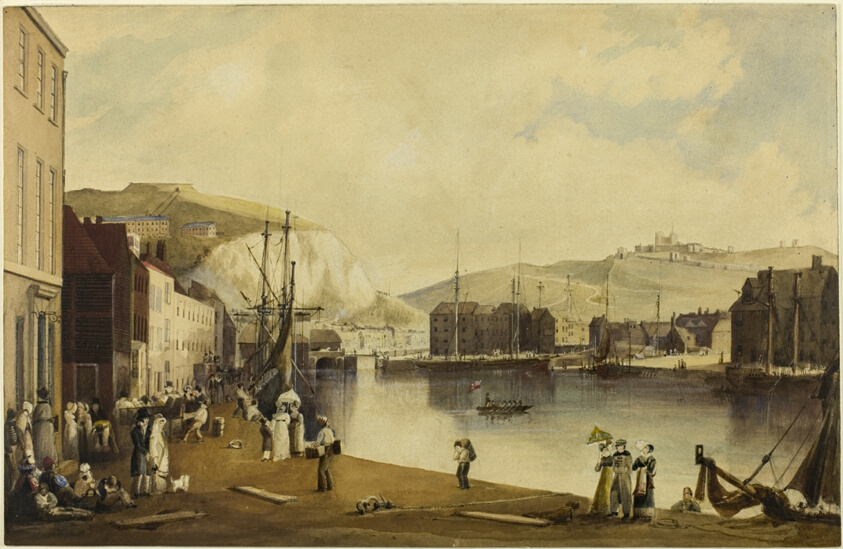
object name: Drawing and Watercolor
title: Dover Harbor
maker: John Gendall (English, 1790-1865)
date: c. 1820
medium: Watercolor and gouache, with pen and brown and black ink, over graphite, heightened with gum arabic, on cream laid paper, laid down on ivory card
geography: England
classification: watercolor; drawings (visual works); prints and drawing